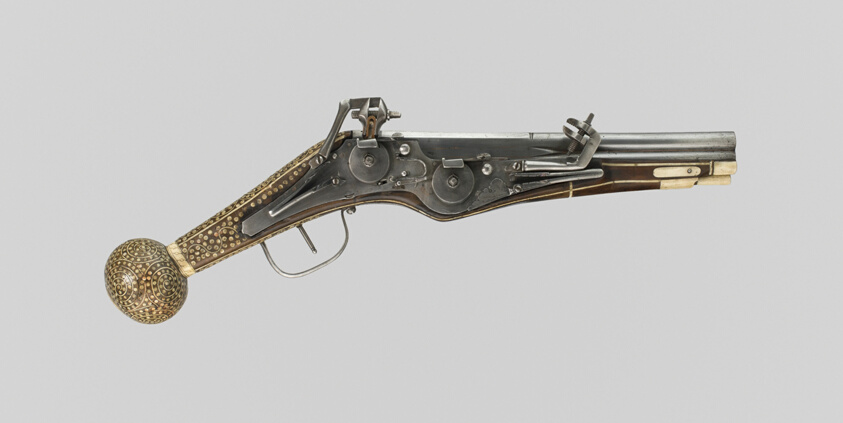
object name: Arms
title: Double-Barrel Wheellock Pistol (Puffer)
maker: German; Saxony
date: 1580/1600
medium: Steel, copper alloy, pyrite, leather, fruitwood, and staghorn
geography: Saxony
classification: firearm-handgun; arms; arms and armor